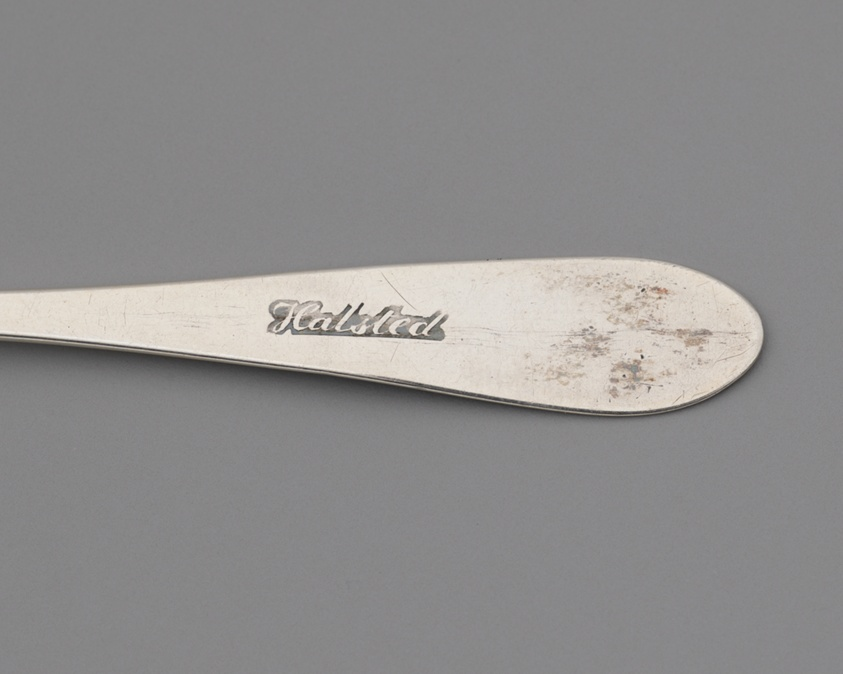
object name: Metalwork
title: Spoon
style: 18th Century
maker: Benjamin Halsted (American, 1734–1817); Probably Philadelphia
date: 1779–85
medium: Silver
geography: Philadelphia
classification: decorative arts; spoon